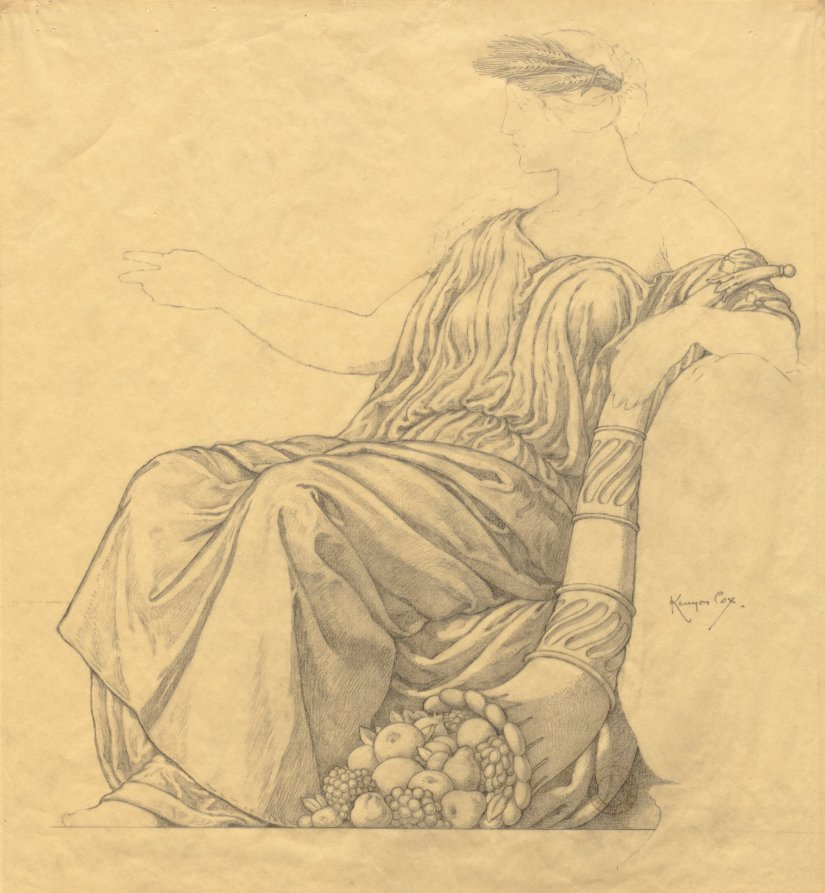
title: Sketch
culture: America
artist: Kenyon Cox (American, 1856–1919)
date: 1912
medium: graphite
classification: Drawing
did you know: This drawing is a preparatory sketch for United States currency, proposed during President Taft's administration.